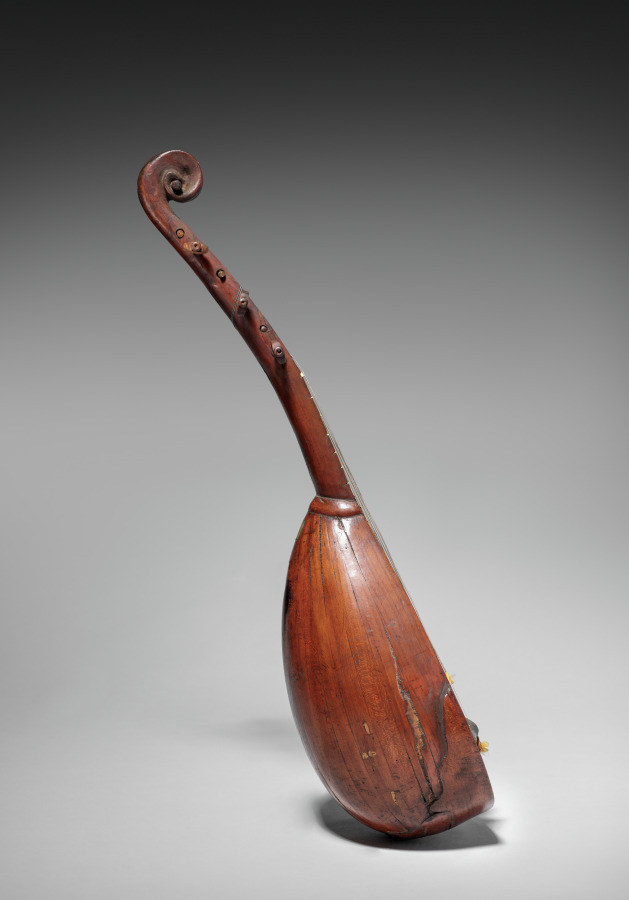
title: Pandurina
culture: Italy, 15th century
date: 1400s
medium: varnished wood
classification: Musical Instrument